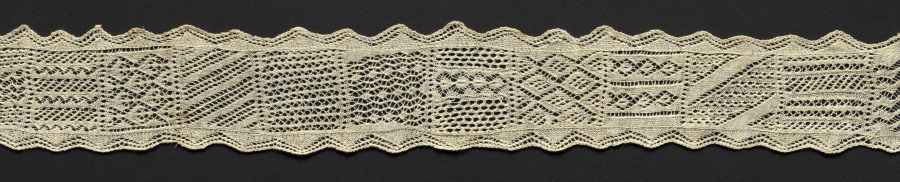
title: Knitted Lace Sampler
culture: Italy, Sienna, 19th century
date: 19th century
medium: knitted linen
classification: Sampler